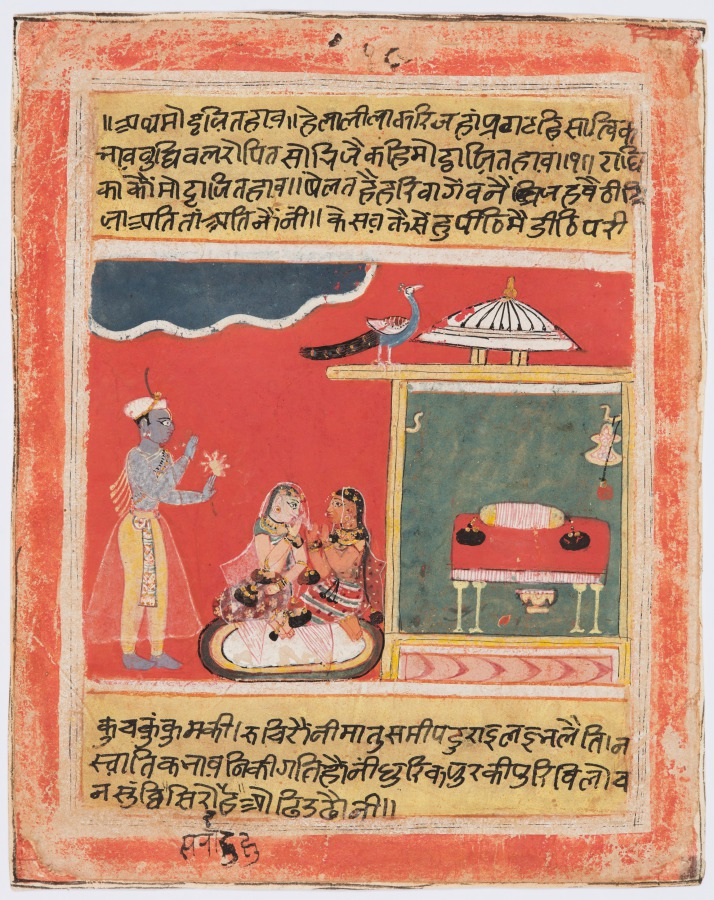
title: Krishna and Radha Avoid Embarrassment: Mottaita Bhava, from a Rasikapriya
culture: Central India, Madhya Pradesh, Malwa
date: c. 1640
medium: Gum tempera and gold on paper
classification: Painting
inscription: (front page) atha moṭṭayita hāva. helā līlā kari jahaṅ prakaṭata sātvika bhāva budhivala rokata sobhijai kahi moṭṭayita hāva. 16. rādhikā kauṅ moṭṭayita hava. khelata he hari bāge bane jahāṅ baiṭhī priyā rati teṅ ati lonī. kesava kaisahuṅ pīṭhi meṅ diṭhi parī kuca kuṁkuma kī ruci ronī. māta samīpa durāi bhale tini sātuka bhāvani kī gati honī. dhūri kapūra kī pūri bilocana sūṁghi sarorūha oḍhi uḍhani.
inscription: (back page) kṛṣna kauṁ moṭṭayita hāva. bhojan kai vṛṣbhānu sabhā mahaṁ baiṭhe he naṁda sadā sukhakārī. gopa ghane bala bīra birājata khāta banāi birī giridhārī. rādhikā jhaṁkī jharokhe hvai jhaṁpa sī lagī gire murjhāi bihārī. sora bhayo samujhe sakuche haruvāi kahyo hari lāgī supārī. 120.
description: The double-sided leaf is based on the theme of embarrassing situations avoided by trickery. Both sides are presented with the same composition and color palette, indicating the unity of emotion felt by the hero and the heroine. The paintings in concert with the verses explore a complex emotion experienced by lovers, its causes, and how it causes the lovers to react.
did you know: Double-sided leaves are rare among painted Rasikapriya sets.